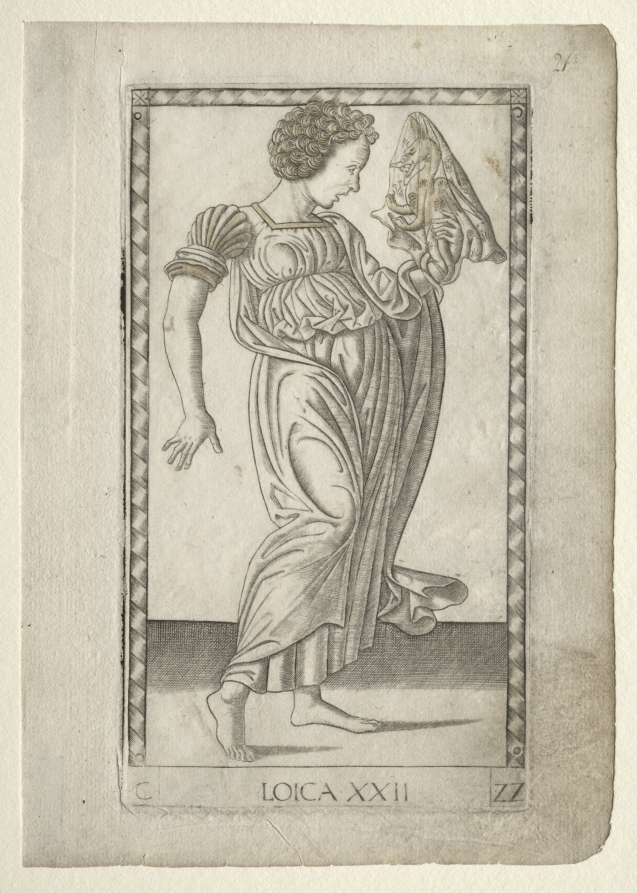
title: Logic (from the Tarocchi, series C: Liberal Arts, #22)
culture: Italy, Ferrara, 15th century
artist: Master of the E-Series Tarocchi (Italian, active 1460s)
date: before 1467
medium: engraving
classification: Print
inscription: Lettered below the image of Loica (Logic): ·C· / ·LOICA·XXII· / ·22·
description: This engraving is part of the group “C” named Liberal Arts. Conceptually, the liberal arts descended from classical antiquity, and were divided into the Trivium (Grammar, Rhetoric, and Dialectic or Logic) and the Quadrivium (Music, Geometry, Arithmetic, and Astronomy). In the Tarocchi set the total number was risen to ten, with the addition of the three disciplines (Poetry, Philosophy, and Theology). The liberal arts denoted knowledge or skills considered necessary to participate in a free society. By the late Middle Ages, they began to be represented in the visual arts as womanlike allegories. Here, Loica (Logic) is personified as a full-length female figure turned to right. Her left hand carries a serpent, covered with a veil.